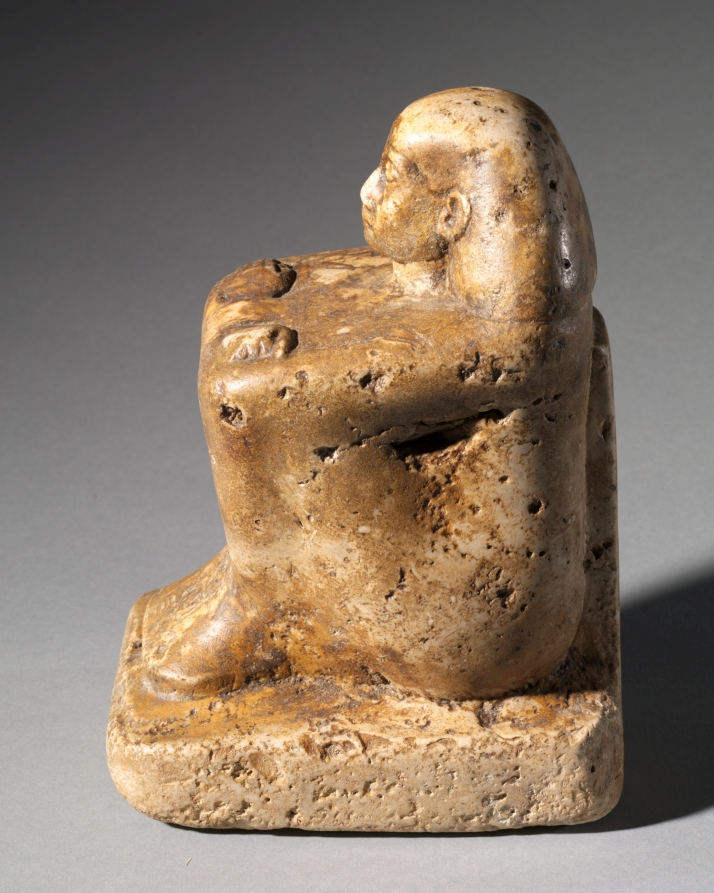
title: Block Statue of Djedbastetiufankh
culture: Egypt, Late period (715–332 BCE), Dynasties 25–26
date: c. 664–610 BCE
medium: limestone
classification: Sculpture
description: There are two basic types of Egyptian statues: tomb statues and temple statues. The Bust of Ankh-Hor and the Block Statue of Djedbastetiufankh in this case are temple statues. The compact form of the block statue appealed to Egyptian sculptors because it was virtually unbreakable. It represents the subject squatting on the ground, arms crossed over his knees. His long, enveloping mantle is contoured to his body shape, so that it resembles a cube. From the position of the arms, it is evident that the Bust of Ankh-Hor originally belonged to a striding figure holding a naos, or shrine, containing the image of a deity. His high.waisted wraparound robe, fashionable during the Persian Period (Dynasty 27) when this figure was carved, would have reached to his ankles.